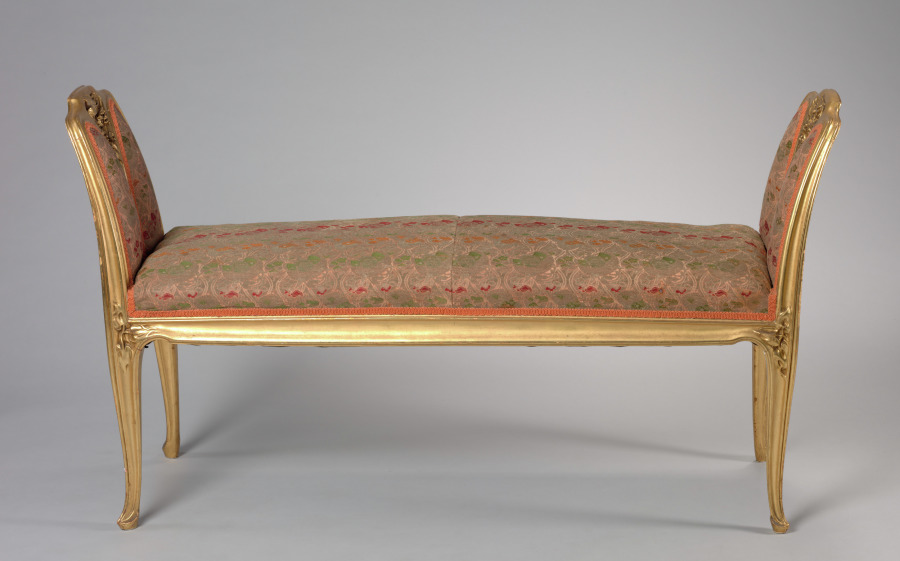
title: Bench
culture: France, Nancy, late 19th-early 20th Century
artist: attributed to Louis Majorelle (French, 1859–1926)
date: c. 1900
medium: gilt wood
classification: Furniture and woodwork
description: In the 20th century, designers of French furniture in the Art Nouveau style began to take inspiration from Rococo pieces of around 1750. With its gently curving forms, this bench exhibits the Majorelle firm's version of this refined taste. It is presently covered with a Japanese brocade of about 1900.